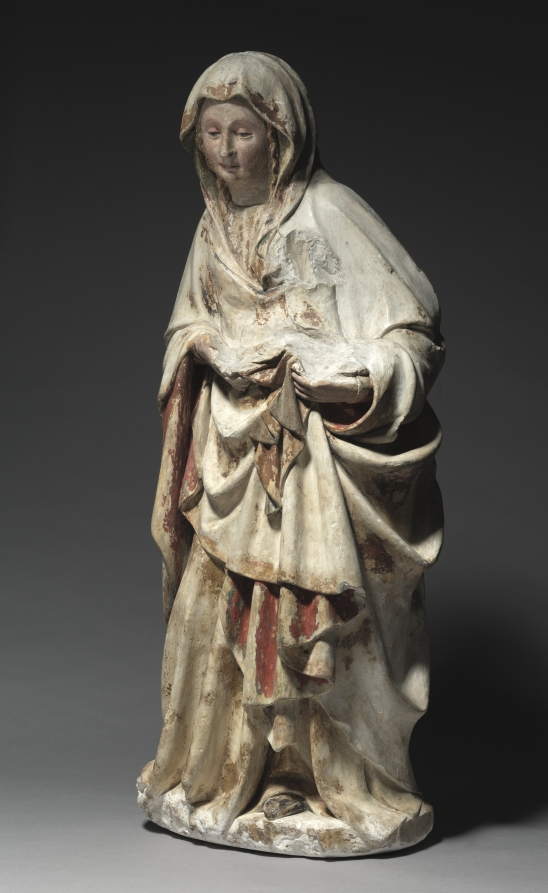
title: Standing Virgin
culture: Netherlands, active Dijon, 15th century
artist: follower of Claus de Werve (Netherlandish, 1380–1439)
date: c. 1440–1450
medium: painted and gilded limestone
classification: Sculpture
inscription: inscriptions on reverse.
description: This standing Virgin now lacks the child she once cradled in her left arm. The sculpture may have been damaged in the French Revolution by falling onto its face. It was carved from soft white limestone of a type known to be quarried at Asnières-lès-Dijon, near Champmol. The figure recalls many of the hallmarks of the style of Claus de Werve, a Netherlandish artist active at the court of Burgundy. The Virgin has a sweet, round face that is also smooth and fleshy, her eyelids droop pensively and she is engulfed in rich voluminous draperies that cascade in deep folds. This sculpture should be seen as a charming reflection of de Werve’s many Virgin and Child groups. It was probably carved by a follower closely acquainted with his style.